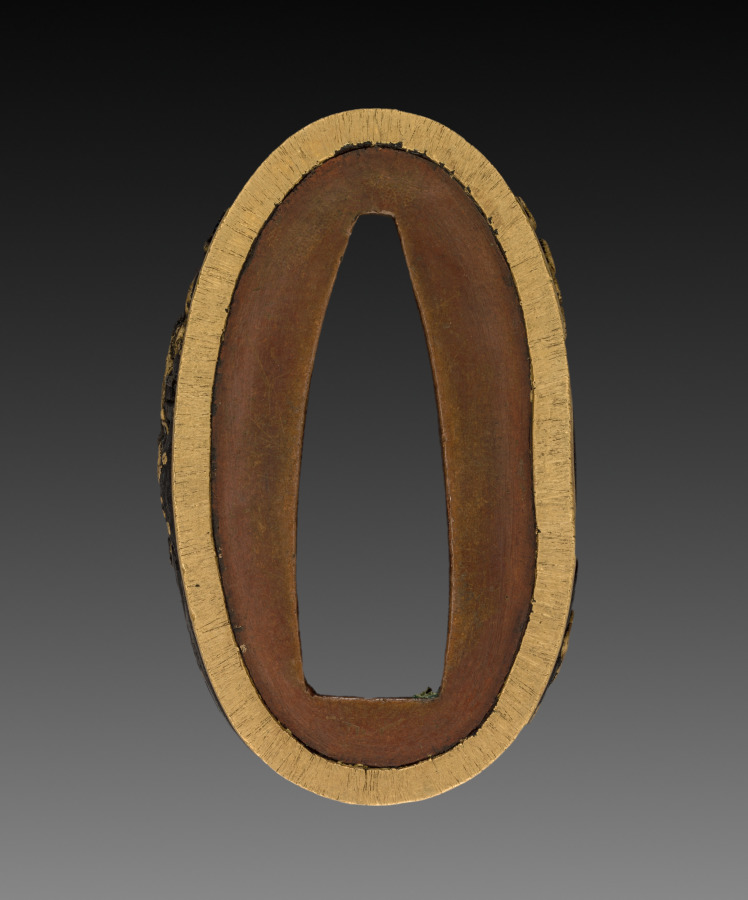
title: Sword-Hilt Collar (Fuchi)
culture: Japan, Edo period (1615–1868)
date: 1700–1850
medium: shakudo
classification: Arms and Armor